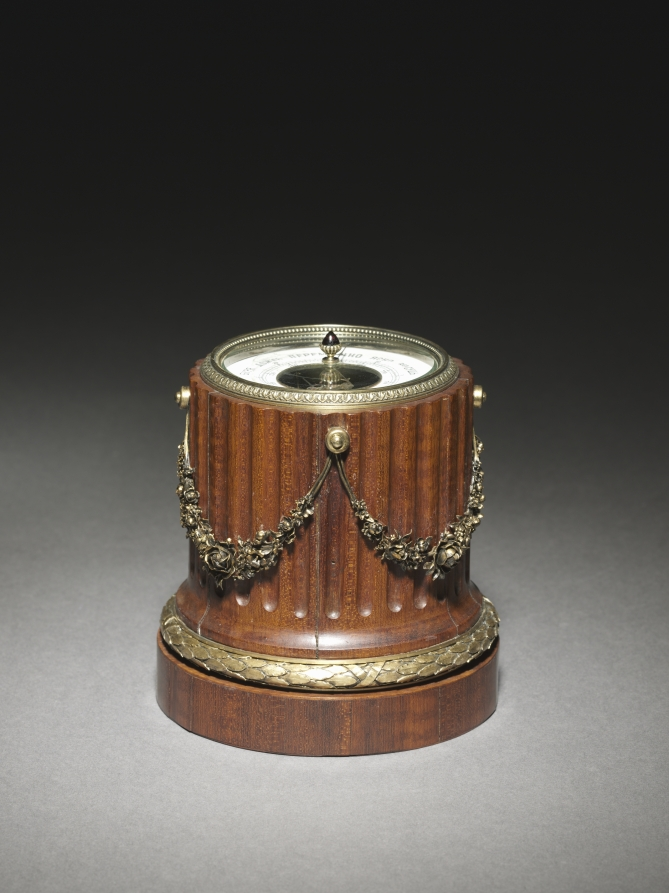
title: Imperial Barometer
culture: Russia, St. Petersburg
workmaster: Johan Viktor Aarne (Finnish, 1863–1934)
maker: House of Fabergé (Russian, 1842–1918)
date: 1900–1901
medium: palisander, silver gilt, ruby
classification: Miscellaneous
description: After obtaining the official warrant to supply objects for the imperial household and the Russian state in 1885, the House of Fabergé became the shop of choice for members of the royal family when purchasing appropriate gifts for the tsar who had everything. Records of these purchases reveal that in 1901 the tsar's brother, Grand Duke Michael Alexandrovich (1878-1918), bought a barometer in the neoclassical style made from palisander wood just a few days before his brother's 33rd birthday. The description of that barometer matches the one now in this collection and is likely the same object.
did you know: This barometer was likely sold by the Soviet Union between 1934 and 1939 as part of a general selling off of former imperial possessions to raise money for the state treasury.